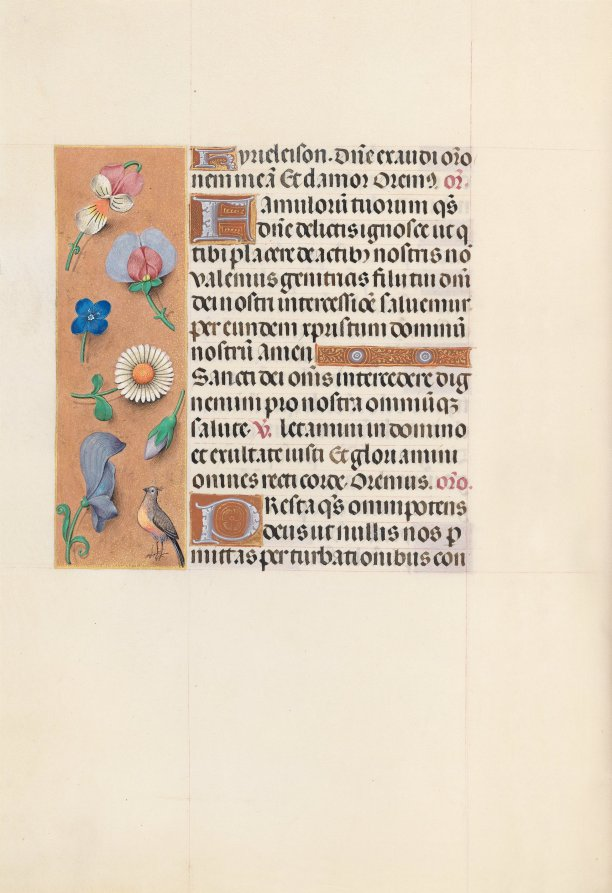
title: Hours of Queen Isabella the Catholic, Queen of Spain: Fol. 144v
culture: Flanders, Ghent and Bruges, late 15th century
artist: Master of the First Prayerbook of Maximillian (Flemish, c. 1444–1519)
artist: and Associates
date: c. 1500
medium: ink, tempera, and gold on vellum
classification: Bound Volume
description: This manuscript was illuminated by a circle of at least five highly organized manuscript painters active in the Flemish cities of Ghent and Bruges. The principal illuminator was Alexander Bening, who painted the majority of the book's miniatures. Manuscripts produced by this circle of artists are renowned for the decoration of their borders, which typically feature a rich variety of realistically-painted flowers, birds, and butterflies. This prayer book, called a book of hours, was intended not for a cleric, but for the private devotions of a lay person-in this case, Isabella the Catholic, Queen of Spain (1451-1504). Isabella's coat of arms embellishes the book's frontispiece. It is unlikely that the book was commissioned by the Queen herself; rather, she probably received it as a diplomatic gift from someone courting her patronage, perhaps Cardinal Francisco Jimenez de Cisneros. A Franciscan friar, Jimenez was dependent upon Isabella for his advancement, first to the post of Queen's confessor in 1492, and then to Archbishop of Toledo in 1495.